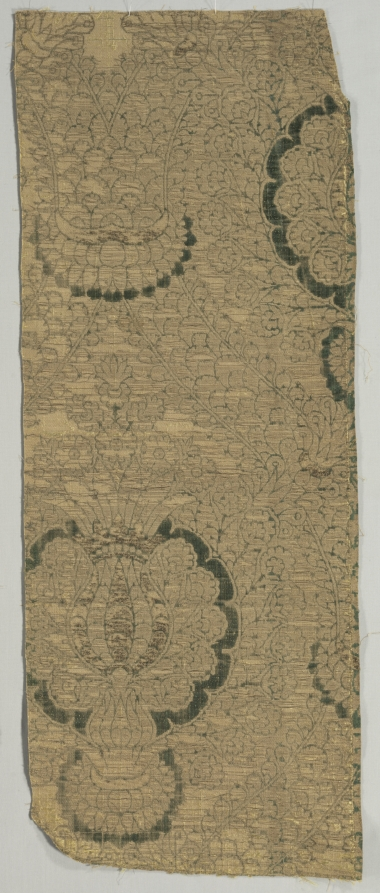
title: Velvet Fragments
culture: Spain, early 16th century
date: early 16th century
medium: velvet (cut, voided, and brocaded): silk and gold thread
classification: Velvet